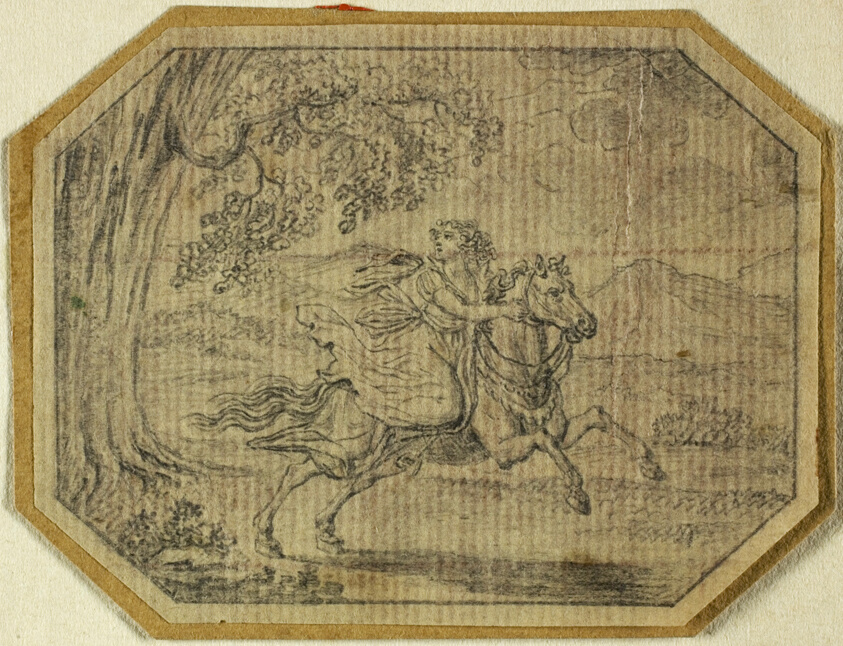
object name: Drawing and Watercolor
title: Young Woman on Galloping Horse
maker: Johann August Rossmassler (German, 1752-1783)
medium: Graphite on pink tinted laid paper, tipped onto tan wove paper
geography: Germany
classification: drawings (visual works); prints and drawing